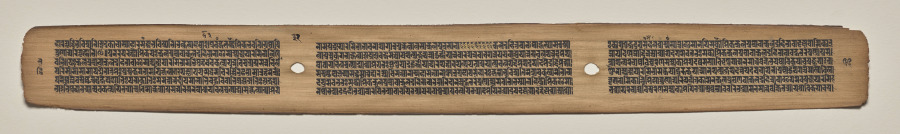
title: Text, Folio 32 (verso), from a Manuscript of the Perfection of Wisdom in Eight Thousand Lines (Ashtasahasrika Prajnaparamita-sutra)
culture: Eastern India, Bihar, Vikramashila Monastery. Painting: Nepal, Kathmandu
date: Sunday, September 14, 1119 (year 239 of the Newar Samvat in the month of Ashvina)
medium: gum tempera and ink on palm leaves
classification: Painting